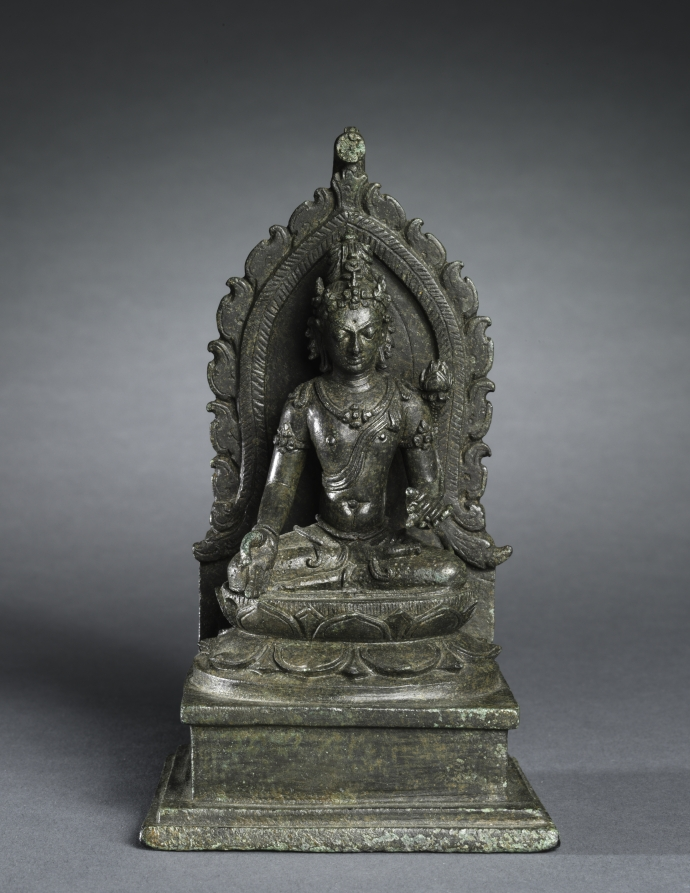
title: Seated Avalokitesvara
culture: Central Java, 9th century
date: 800s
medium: bronze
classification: Sculpture